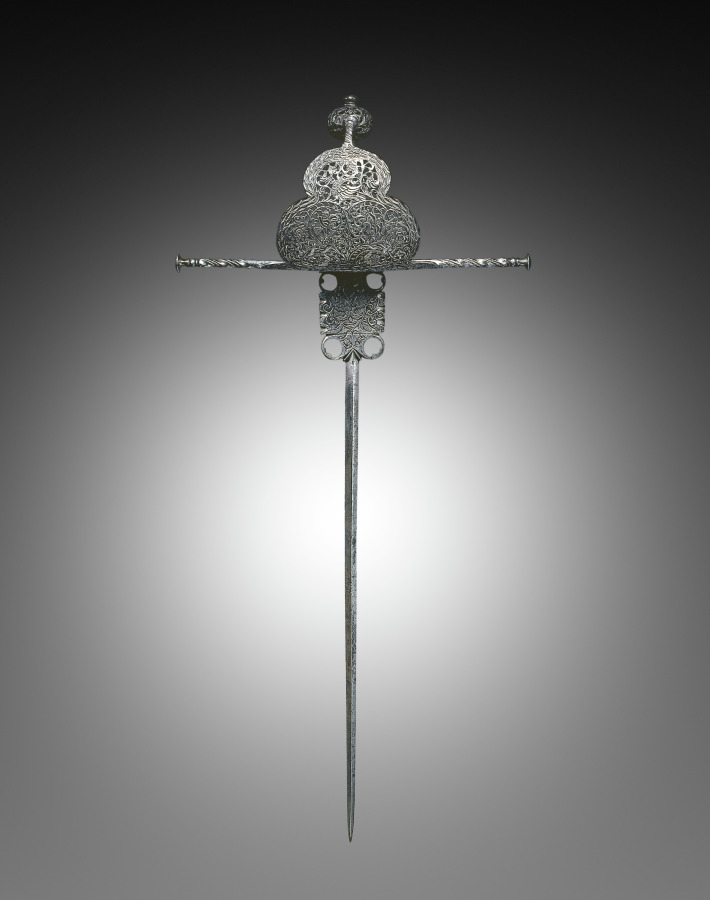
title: Left-Handed Dagger or "Main Gauche"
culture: Spain or Italy, Naples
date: c. 1650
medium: steel, pierced and chiseled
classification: Arms and Armor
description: For parrying, rapiers were often made with accompanying daggers as a matched set, although the rapier shown here (1916.1810) does not originally belong to this dagger. Daggers such as this one have been misleadingly called "left-handed daggers" even though they could be held in either hand. The guard is richly decorated with chiseled and pierced arabesques, an ornamental design consisting of intertwined flowing lines.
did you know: The main-gauche (French for "left hand") was used mainly to assist in defense by parrying enemy thrusts, while the dominant hand wielded a rapier.